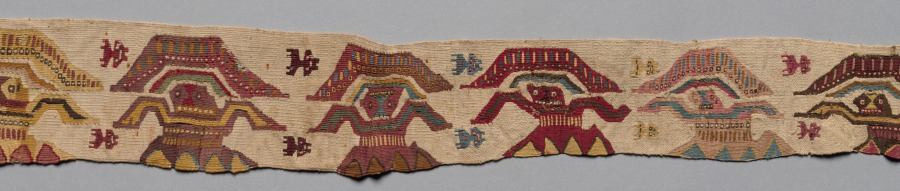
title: Lower Border of a Garment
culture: Central Andes, North Coast, Chimú or Lambayeque (Sican) People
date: 1000–1470s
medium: tapestry; wool and cotton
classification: Textile